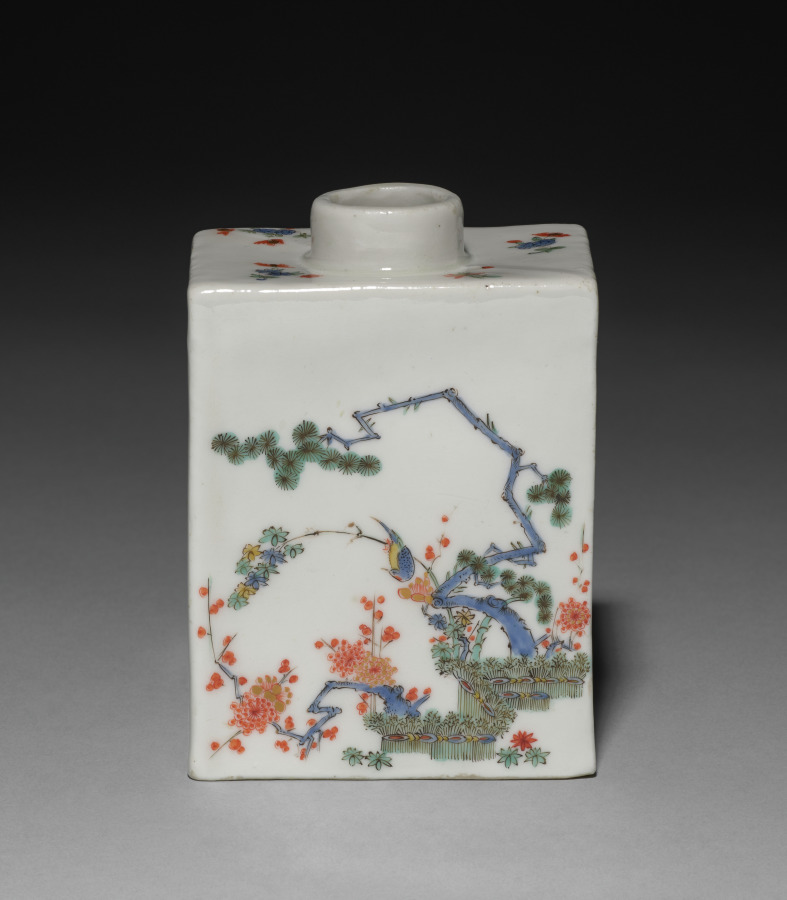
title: Tea Caddy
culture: Germany, Meissen, 18th century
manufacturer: Meissen Porcelain Factory (German, est. c. 1710)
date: c. 1735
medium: porcelain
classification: Ceramic